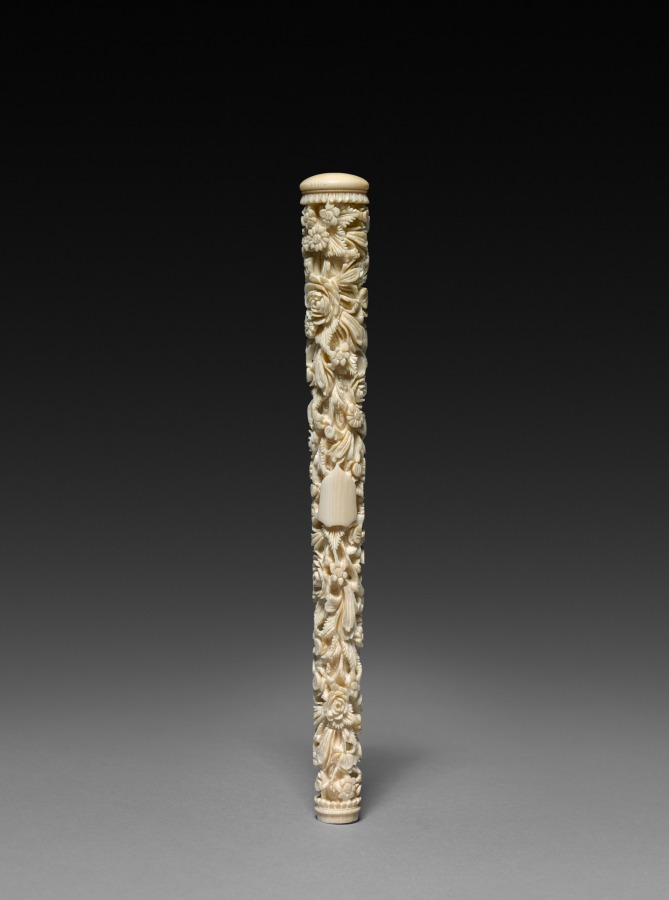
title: Carved Handle for Parasol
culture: Japan, Meiji period (1868–1912)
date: early 1900s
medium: ivory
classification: Ivory